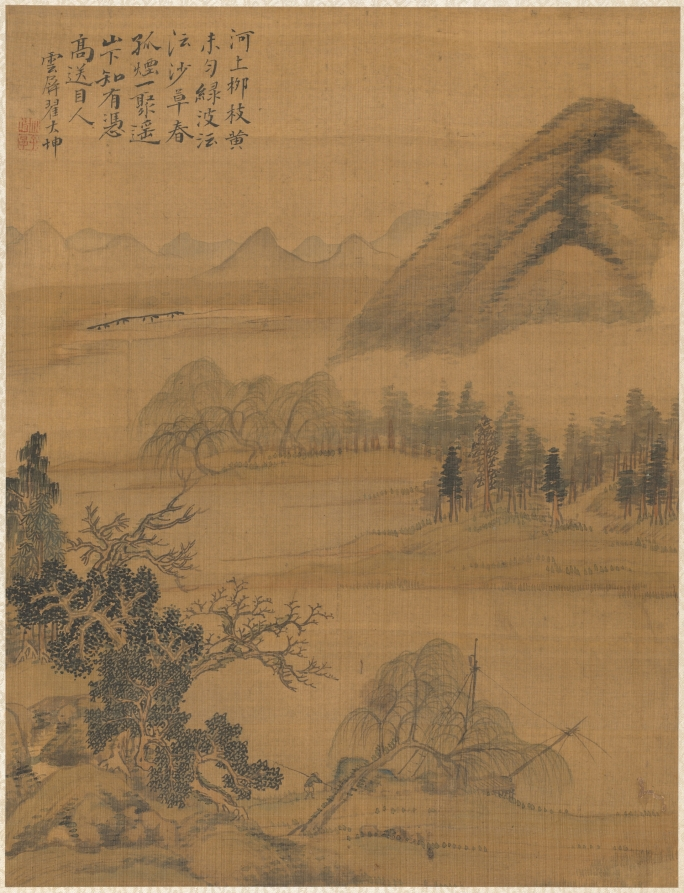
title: Landscape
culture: China, Qing dynasty (1644-1911)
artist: Zhai Dakun (Chinese, d. 1804)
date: 1775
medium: album leaf; ink and color on silk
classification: Painting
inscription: Willow Branches in Spring Over the river the willow branches are only partially yellow, The green waves rush by the sand and grass in spring, Lonely clouds cluster below the distant mountains, One can only see them from a great height. Yunping Zhai Dakun. Seals: 1) r/i "Dakun" 2) r/r "Zihou"